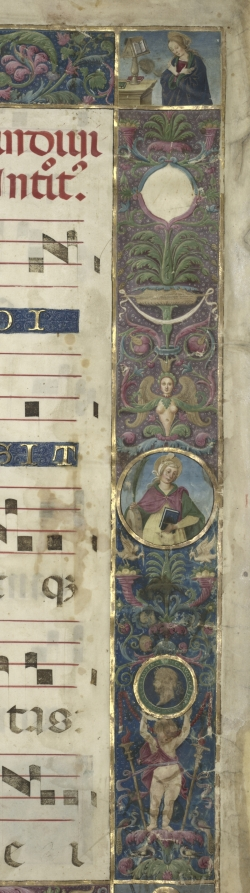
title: The Trinity: Leaf from a Gradual with Initial B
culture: Italy, Perugia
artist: circle of Perugino (Italian, c. 1450/55–1523)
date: c. 1496–1502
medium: ink, tempera, and gold on parchment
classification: Manuscript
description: The focus of this lavishly illuminated page is a large initial B containing a representation of the Holy Trinity (three persons in one godhead). The text, Benedicta sit sancta Trinitas, introduces the opening of the Introit for Mass on Trinity Sunday, celebrated one week after Pentecost. An illusion has been created by the artist who painted the framing initial to appear three-dimensional. Beyond the initial a landscape recedes as if viewed through an open window. The decoration extends into all four margins that are filled with small miniatures depicting saints (one was left blank). This page is a masterful example of Renaissance manuscript painting with classicizing leaf scrolls, masks, urns, putti, and other decorative motifs fashionable in Italy at the close of the 15th century. It may come from a set of choir books illuminated for Perugia Cathedral.